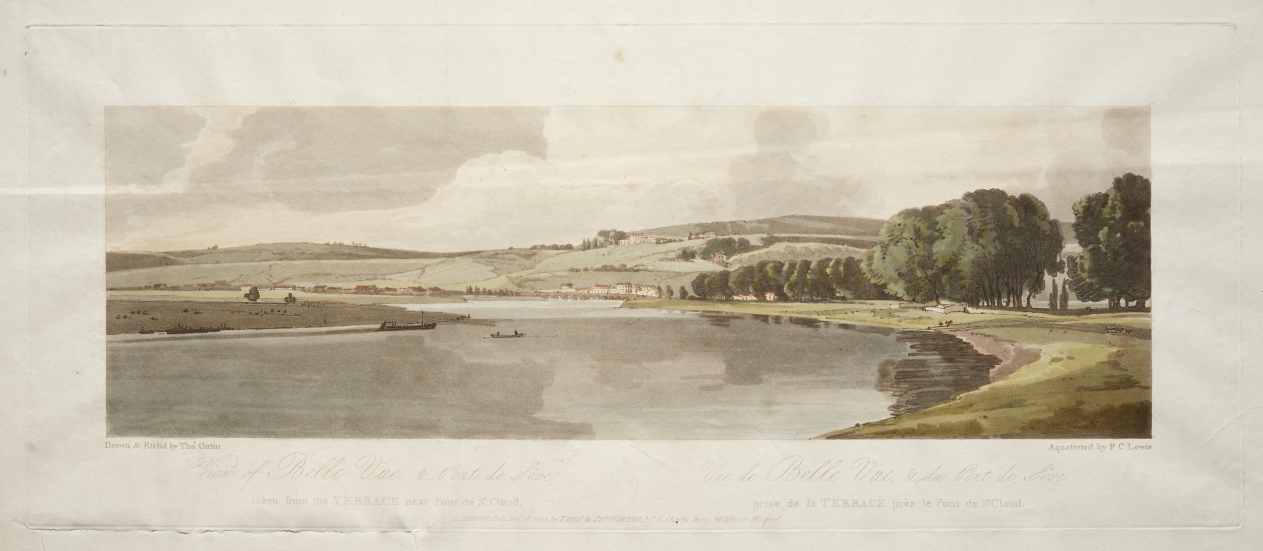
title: A Selection of Twenty of the Most Picturesque Views in Paris: View of Belle Vue & Pont de Sêve taken from the Terrace near Pont de St. Cloud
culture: England, 19th century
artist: Thomas Girtin (British, 1775–1802)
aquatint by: Frederick Christian Lewis (British, 1779–1856)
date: 1802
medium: Softground etching and aquatint, printed in brown, hand-colored with watercolor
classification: Print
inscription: In plate; Drawn & Etch'd by Thos Girtin; Aquatinted by F. C. Lewis; LONDON: Pubd Decr 16, 1802 by Thos & JNo Girtin, No. I, Little Newport Street, Gerrard Street, Soho. In plate, lower right: 13